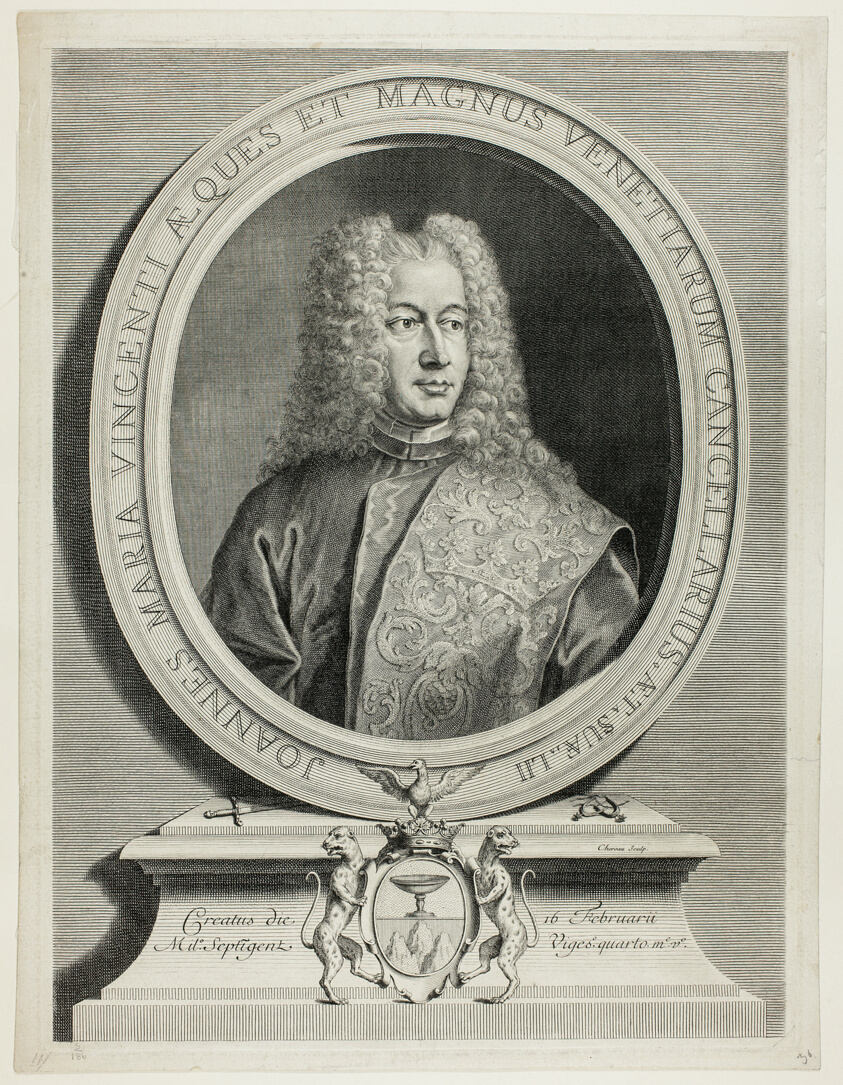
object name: Print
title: Joannes Maria Vincenti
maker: Jacques Chereau (French, 1688-1776)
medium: Etching and engraving on paper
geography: France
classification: etching; print; prints and drawing